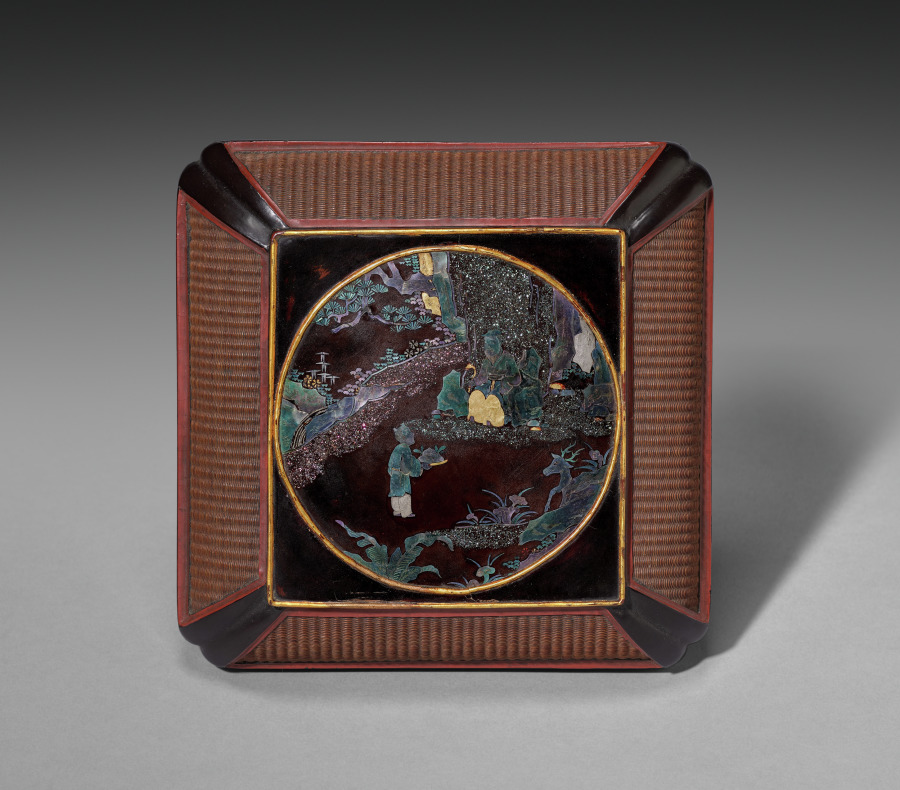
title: Wickerwork Box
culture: China, Ming dynasty (1368-1644), Wanli reign (1572-1620)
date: 1609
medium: lacquered wickerwork (of woven bamboo) framed in wood with circular scene inlaid in mother-of-pearl and gold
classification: Lacquer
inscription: Inscription at bottom in red on black lacquer reads: "commissioned by Yü-Yün-ch'i".